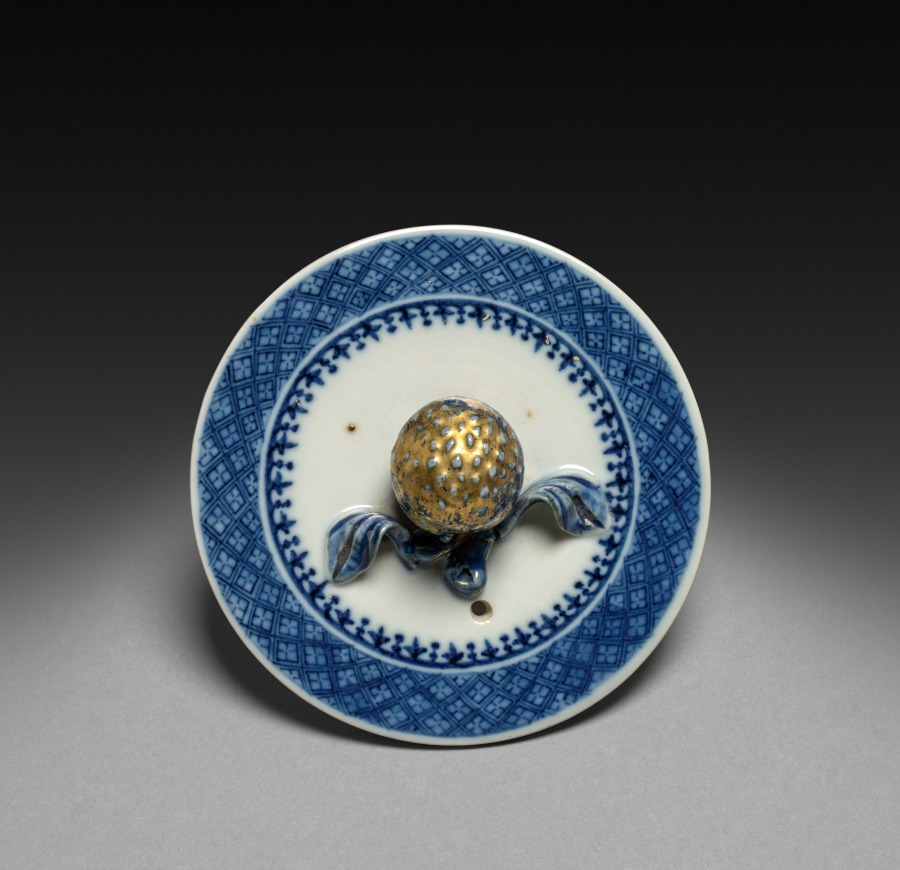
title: Teapot (lid)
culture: China, Chinese Export -- English or American Markets, 18th century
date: c. 1775–1800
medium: porcelain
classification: Ceramic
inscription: on body of teapot, in heraldic shields: "JS."